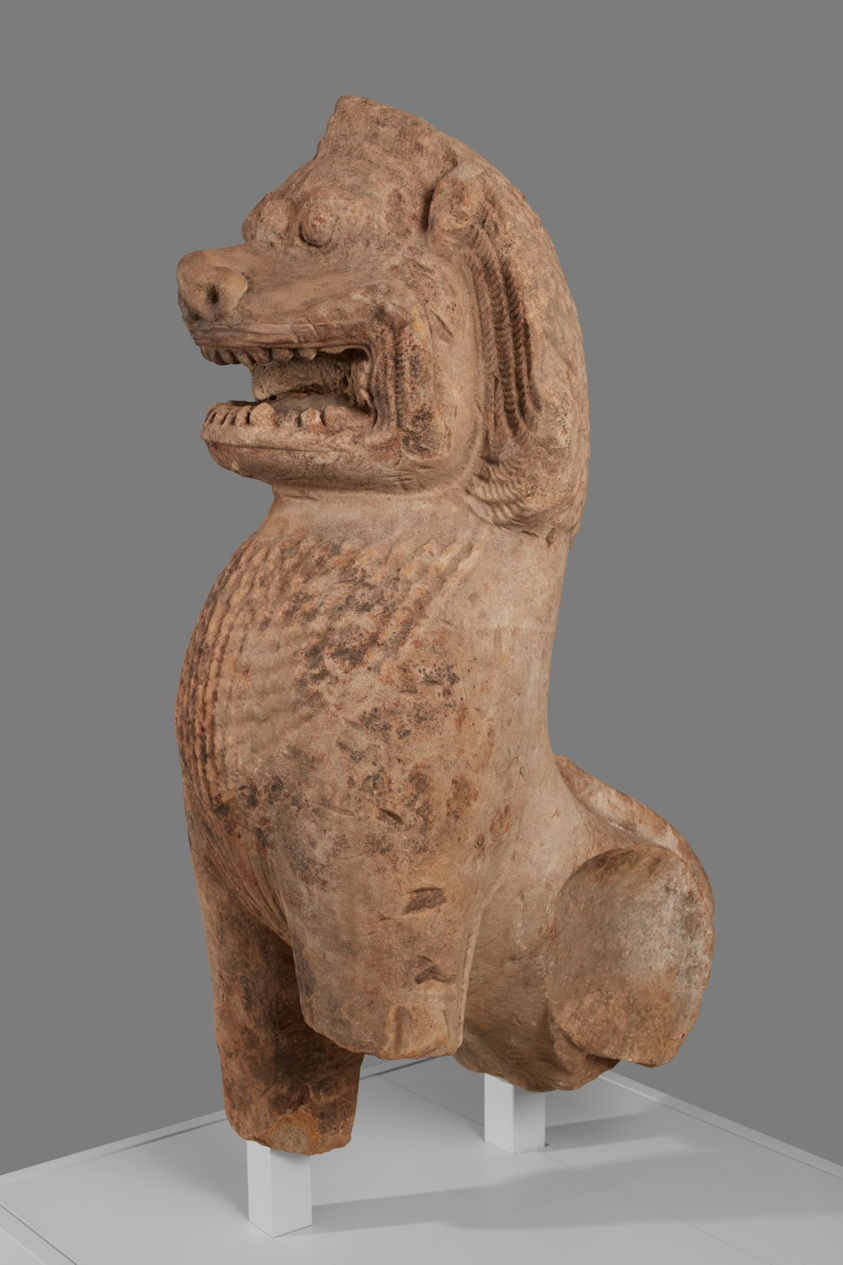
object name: Sculpture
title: Guardian Lion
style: angkorean, cambodian, Southeast Asian, asian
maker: Cambodia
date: Angkor period, 12th century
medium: Sandstone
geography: Cambodia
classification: sandstone; stone; sculpture; asian art